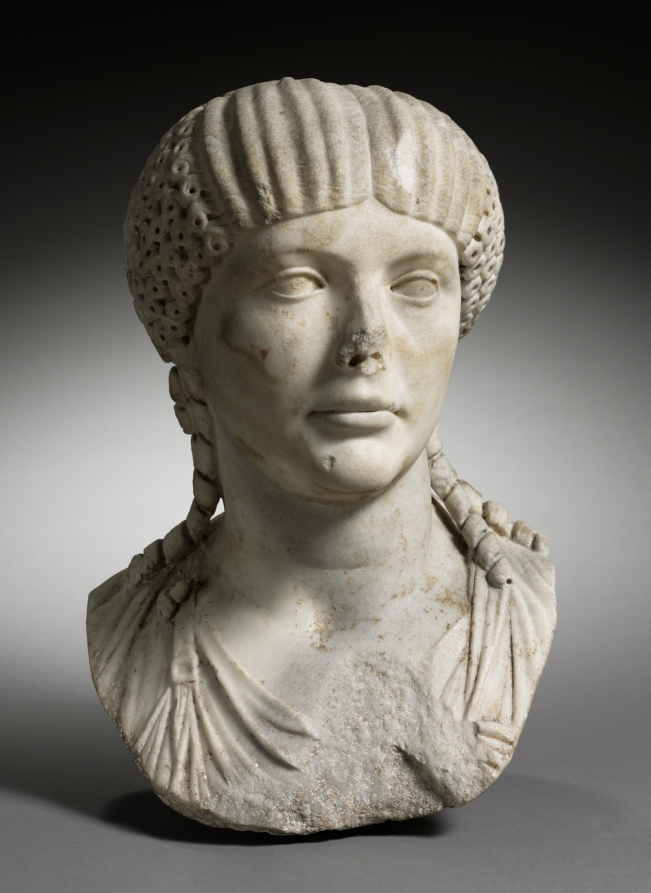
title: Portrait Bust of the Empress Claudia Octavia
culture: Italy, Roman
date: 50–70 CE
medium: marble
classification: Sculpture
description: This portrait bust depicts a young woman whose idealized features and elaborate hairstyle may identify her as the empress Claudia Octavia (r. AD 54-62), unfortunate first wife of the notorious emperor Nero. Over her tunic she wears a stola, a long garment hanging from both shoulders and distinguishing her as a married, upper-class woman. Although beloved by the Roman citizenry and described by the historian Tacitus as “aristocratic and virtuous,” Octavia was eventually divorced and banished by Nero, then ordered put to death.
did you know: The complex coiffure includes four elements: parted waves (top), tight curls (sides), hanging ringlets (shoulders, back), and a braided knot (back).